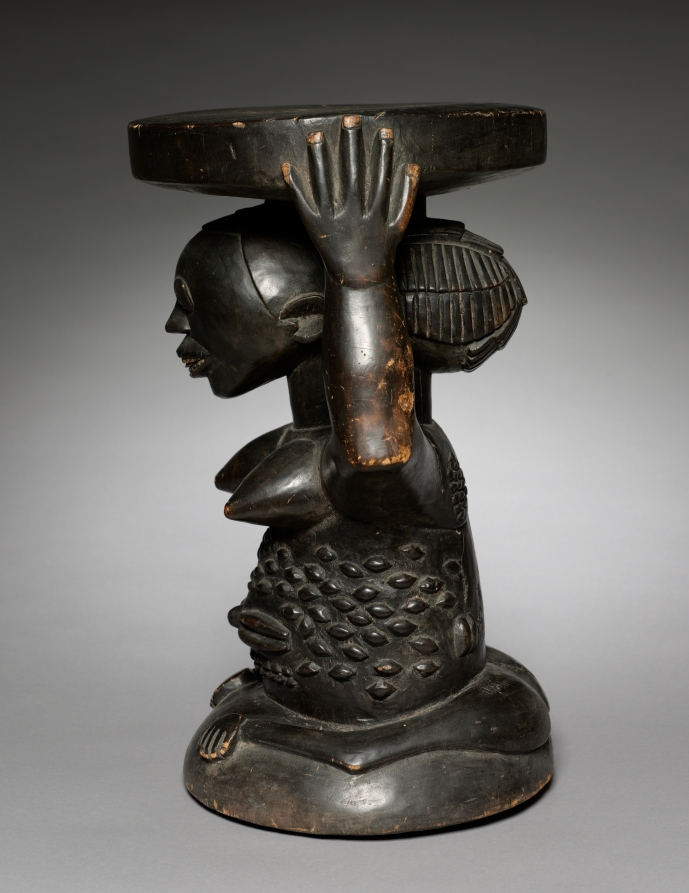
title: Caryatid Stool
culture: Africa, Central Africa, Democratic Republic of Congo, Luba-style carver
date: c. 1900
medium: wood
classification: Furniture and woodwork